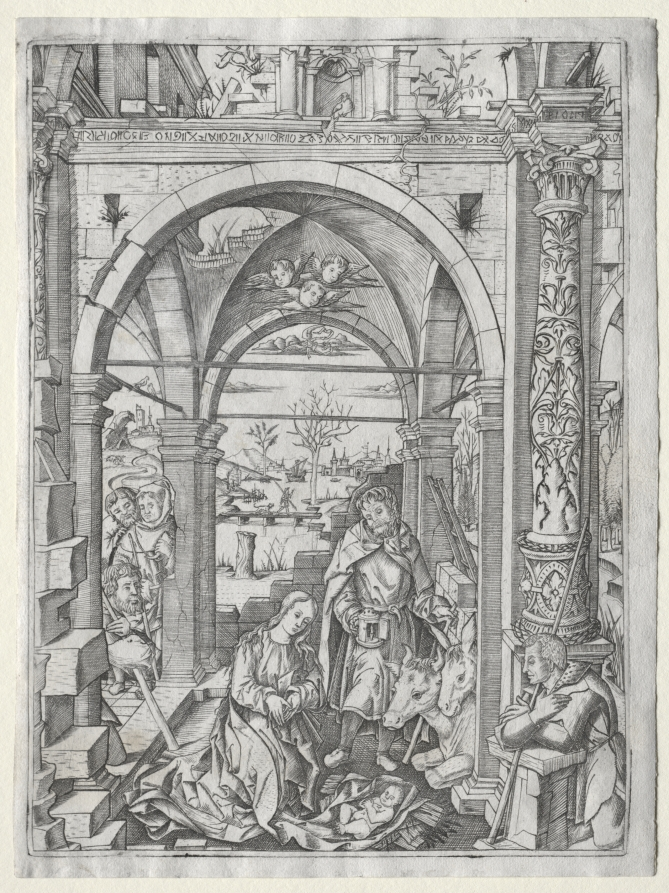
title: Adoration of the Shepherds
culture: Italy, 16th century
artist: Nicoletto da Modena (Italian, active c. 1500–1520)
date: c. 1500–1510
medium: engraving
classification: Print